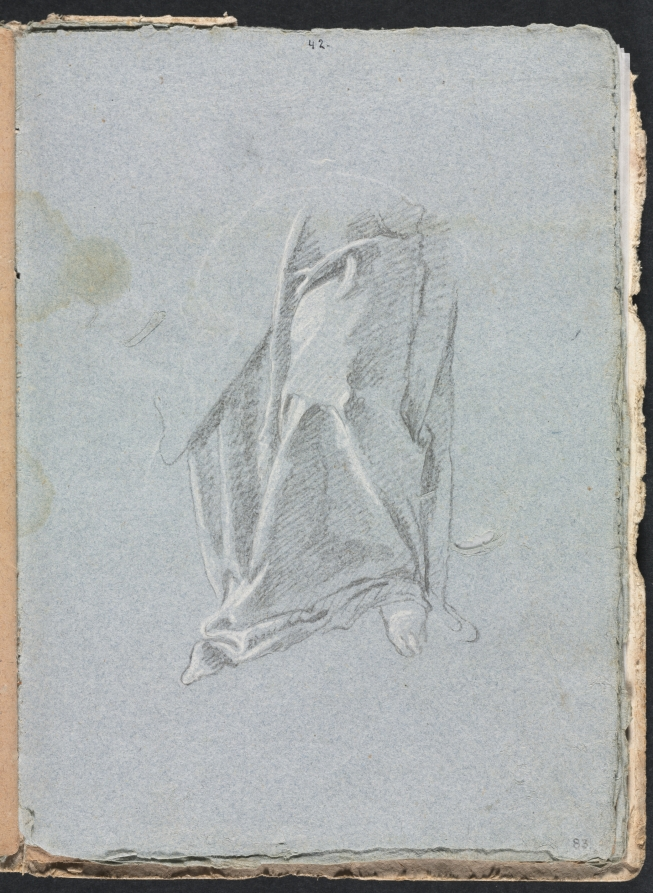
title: Verona Sketchbook: Drapery with foot (page 83)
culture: Italy, 18th century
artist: Francesco Lorenzi (Italian, 1723–1787)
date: 1760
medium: black chalk with white heightening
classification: Bound Volume